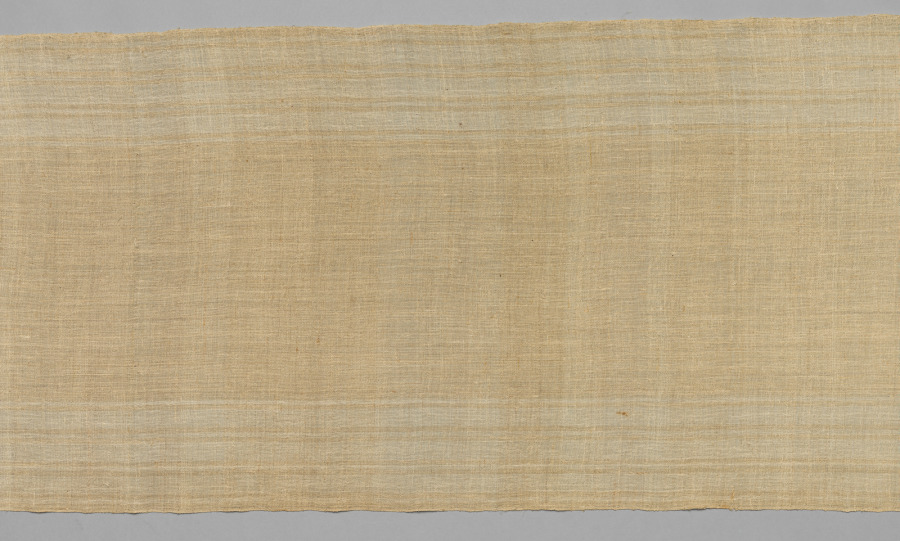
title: Towel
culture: Greece, Sporades Islands, Skyros, 18th century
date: 1700s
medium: embroidery in silk, gold and silver threads on natural linen ground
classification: Embroidery